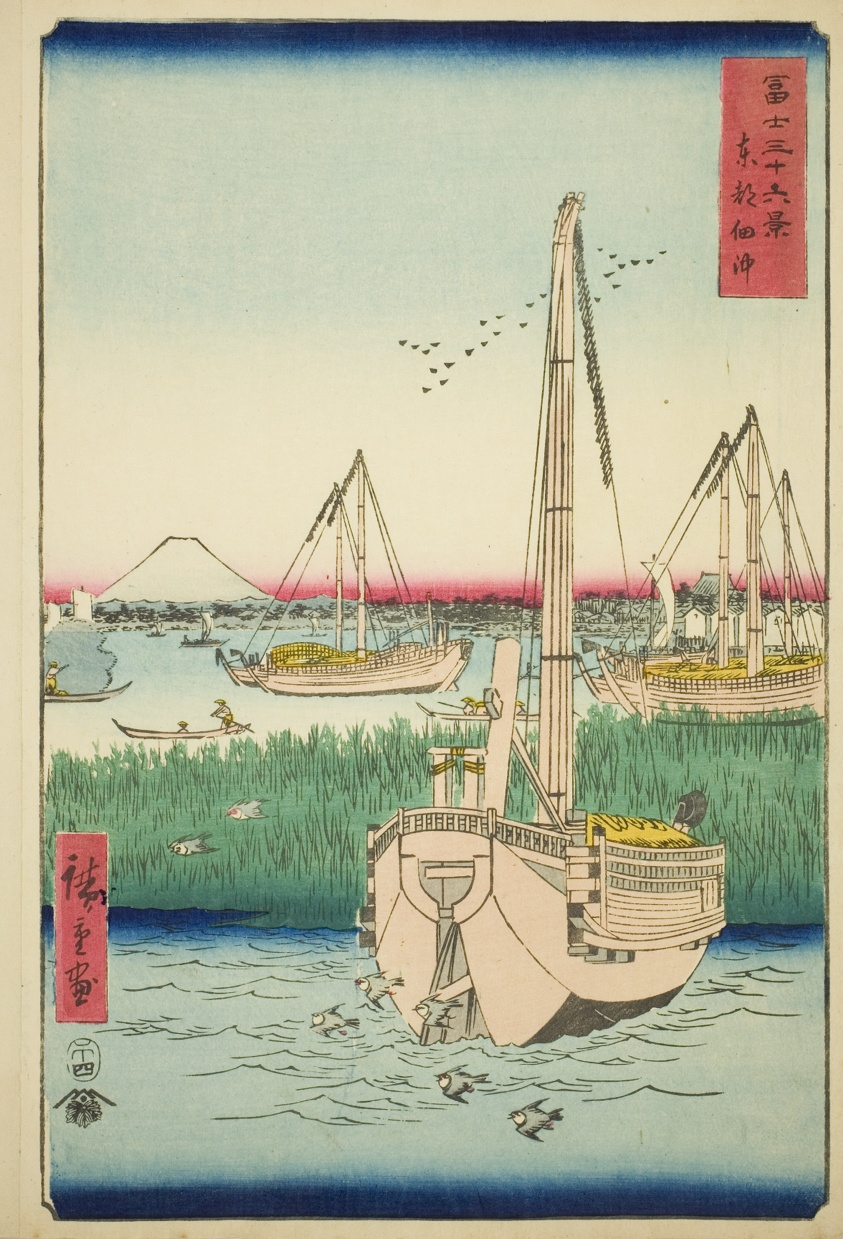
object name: Print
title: Off Tsukuda Island in the Eastern Capital (Toto Tsukuda oki), from the series "Thirty-six Views of Mount Fuji (Fuji sanjurokkei)"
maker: Utagawa Hiroshige 歌川 広重; Japanese, 1797-1858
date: 1858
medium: Color woodblock print; oban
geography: Japan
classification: woodblock print; print; asian art